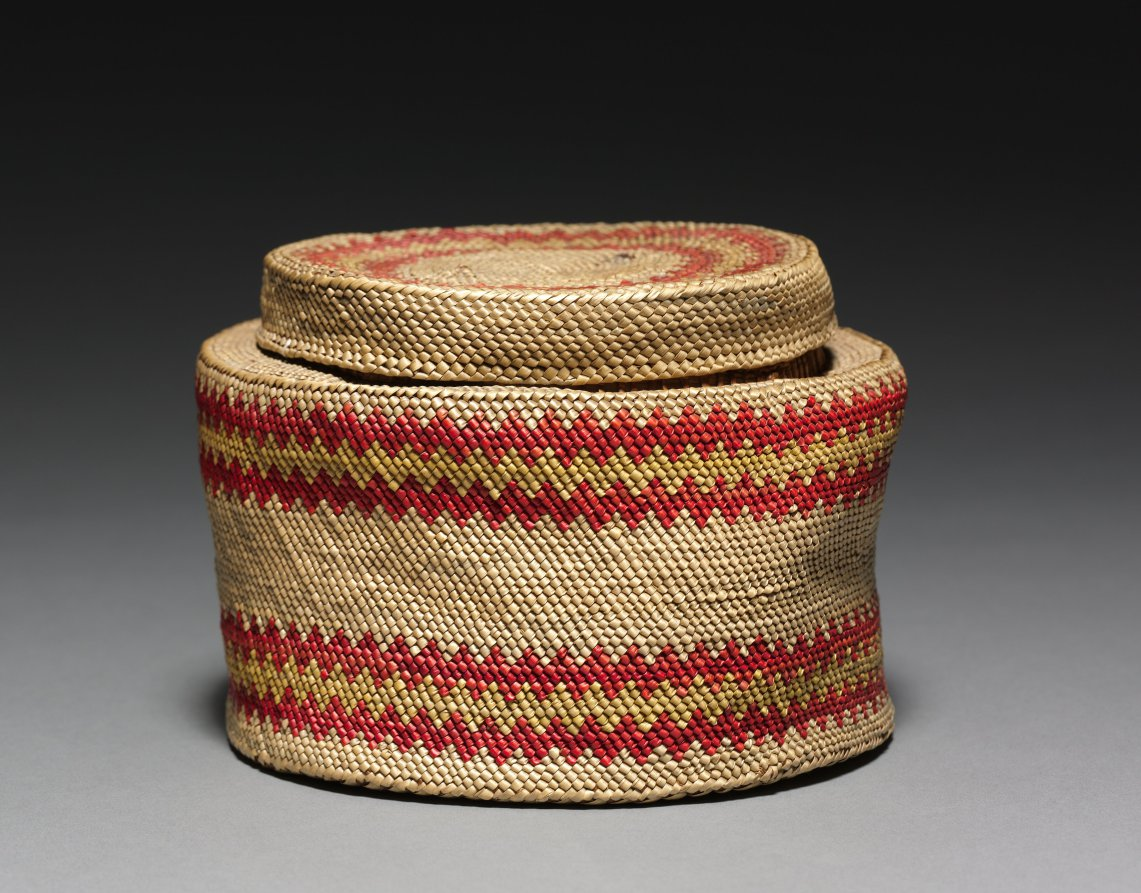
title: Ginger Jar- Shaped Basket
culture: Northwest Coast, Cape Flattery, Washington, Makah, late 19th-early 20th century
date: c 1900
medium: pear grass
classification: Basketry